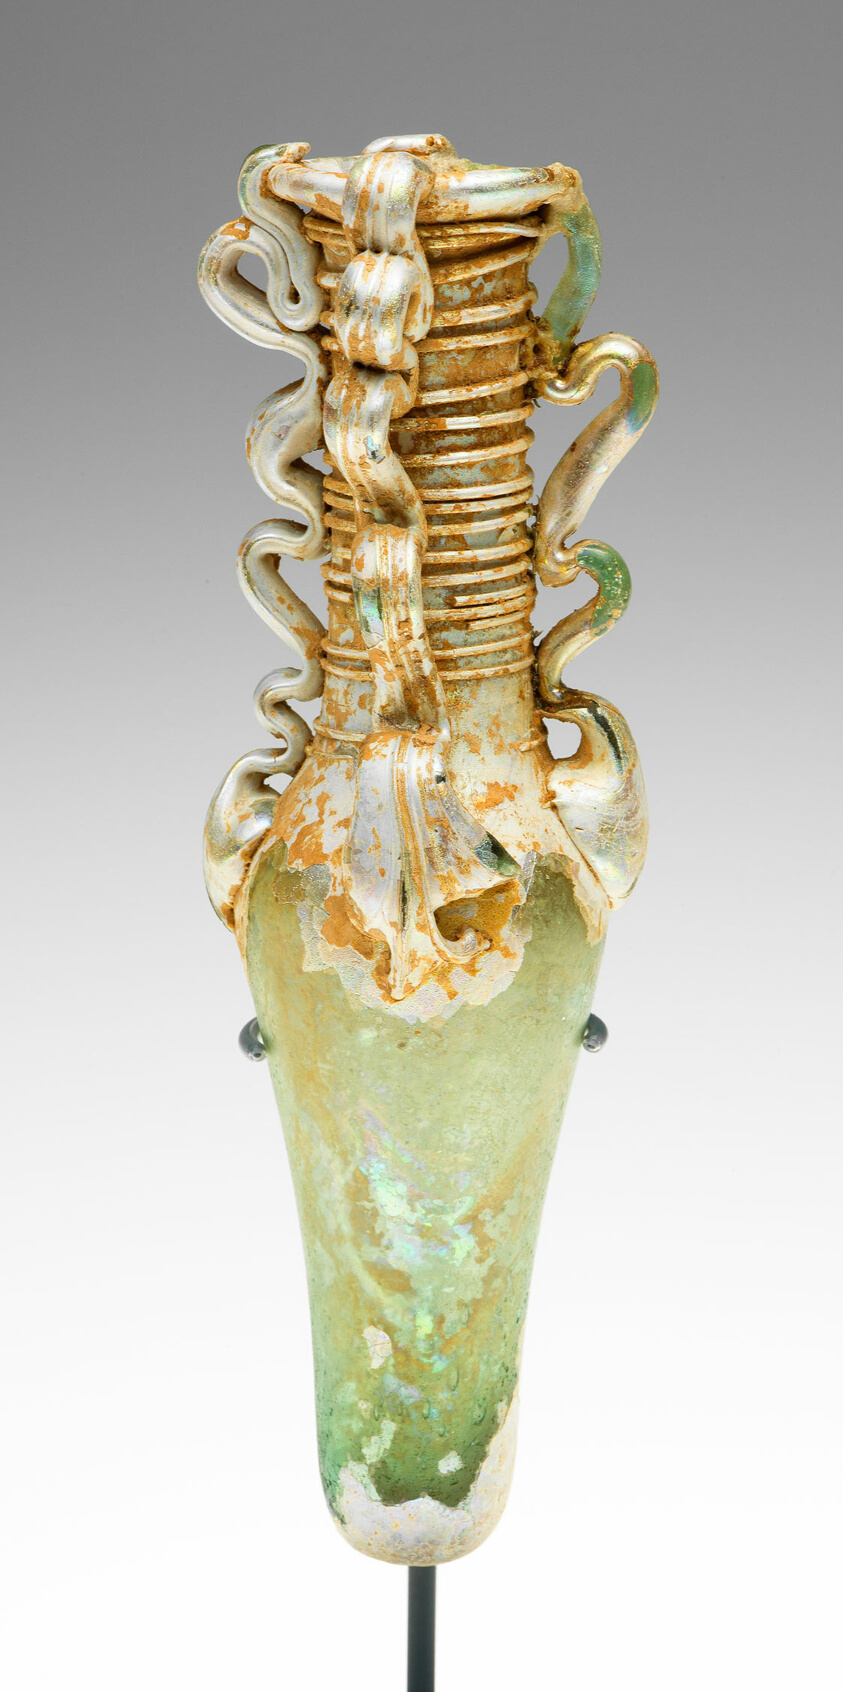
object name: Vessel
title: Bottle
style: roman (ancient, style or period), ancient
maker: Late Roman or early Byzantine; coast of Syria or Palestine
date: 4th-6th century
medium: Glass, blown technique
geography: Mediterranean Region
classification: bottle; glass; vessel; ancient art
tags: beauty, rituals